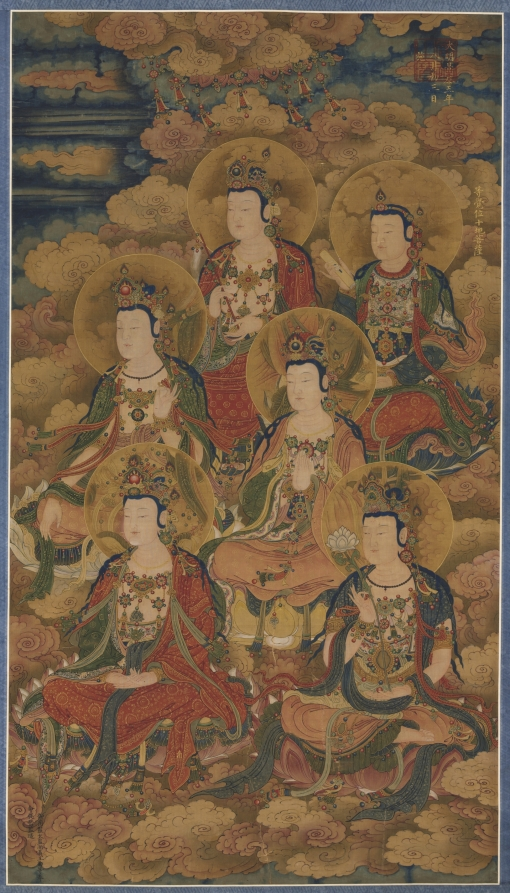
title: The Bodhisattvas of the Ten Stages in Attaining the Most Perfect Knowledge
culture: China, Ming dynasty (1368–1644)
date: 1454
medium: hanging scroll; ink and color on silk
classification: Painting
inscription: 大明景泰五年八月初三日施 [印] 廣運之寳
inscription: 御用監太監尚義王勤等奉命提督監造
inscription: 等覺位十地菩薩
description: This painting represents bodhisattvas of the 10 stages of enlightenment undergoing the final processes toward Buddhahood. This and CMA 1973.70.2 form part of a set of scrolls that were used to perform the Water-Land (shuilu) ritual. The sinuous curves of scarf and drapery, the layering of garments, and the minute detail all reflect the opulent visual atmosphere that surrounded the Ming worshipper in temples and spirit halls throughout the country. In the upper right corner of each painting is an imperial seal and an inscription in gold: Donated on the third day of the eighth month in the fifth year of the Jingtai reign (1454) of the Great Ming. Written in ink in the lower left corner is the record that they were made on imperial order, probably to present them to the Da Longfu monastery in Beijing.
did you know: This painting was used in the grandest of the Buddhist mortuary rites, the Water-Land (shuilu) ritual, which was conducted for the salvation of “all souls of the dead on land and sea.”